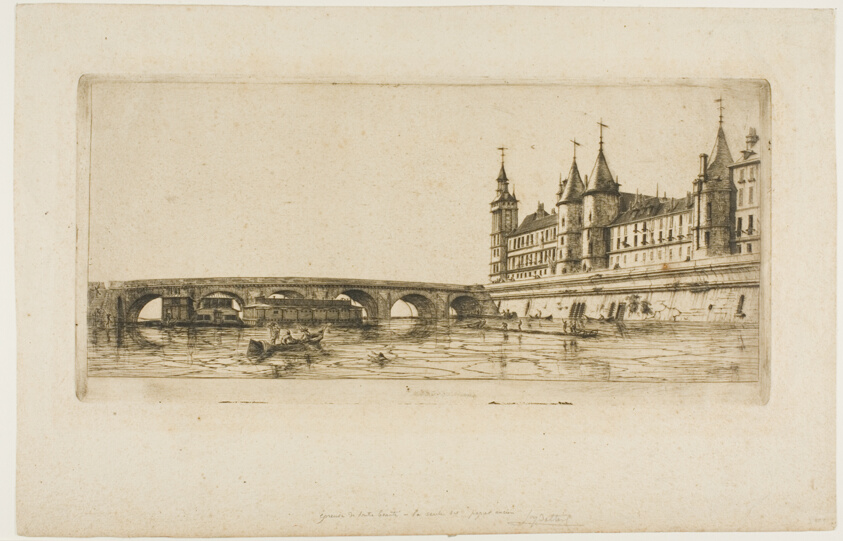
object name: Print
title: Pont-au-Change, Paris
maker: Charles Meryon (French, 1821-1868)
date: 1854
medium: Etching on ivory laid paper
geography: France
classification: etching; print; prints and drawing